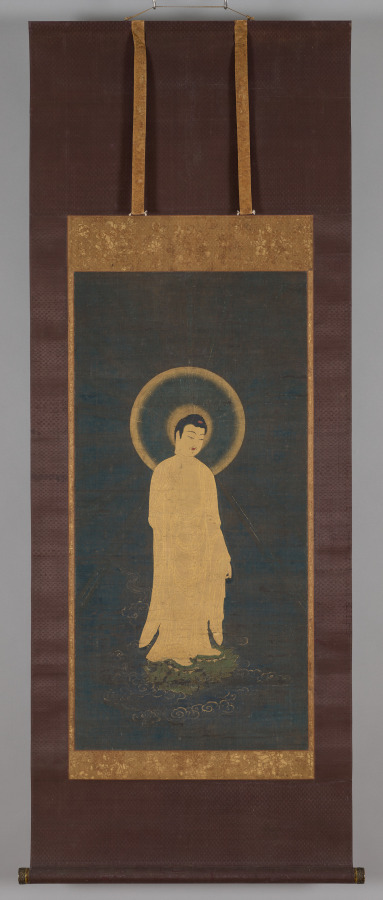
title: Welcoming Descent of Amida Buddha (Raigō)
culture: Japan, Kamakura period (1185–1333)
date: c. 1270–1333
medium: hanging scroll; ink, color, gold and cut gold on silk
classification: Painting